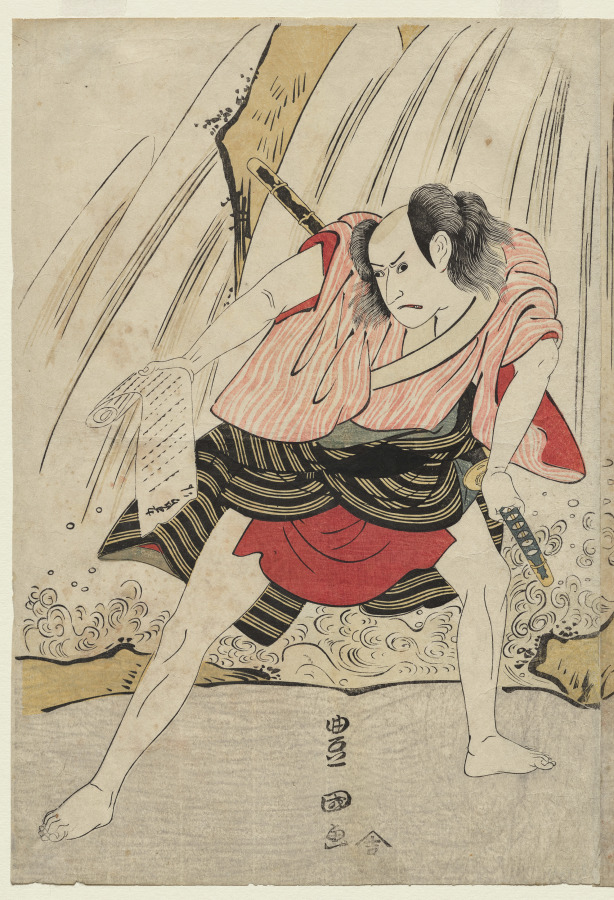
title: Kataoka Nizaemon VII and Ichikawa Yaozo III in a Confrontation Beside a Waterfall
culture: Japan, Edo period (1615–1868)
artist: Utagawa Toyokuni (Japanese, 1769–1825)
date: c. 1797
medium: color woodblock print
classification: Print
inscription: Signature: Toyokuni ga